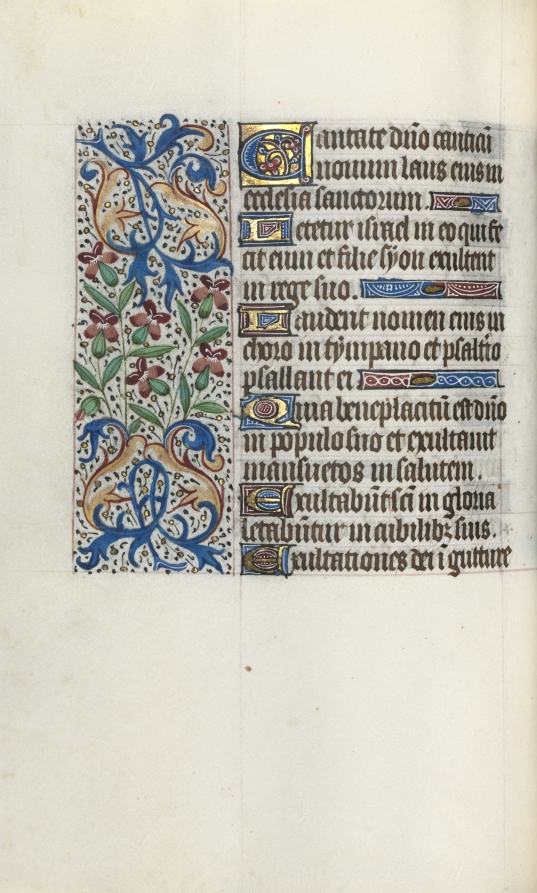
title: Book of Hours (Use of Rouen): fol. 45v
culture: France, Rouen, 15th century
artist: Master of the Geneva Latini (French, active Rouen, 1460–80)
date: c. 1470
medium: ink, tempera, and gold on vellum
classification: Bound Volume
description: In the late 1400s and early 1500s Rouen was an established and important center of book production. The city’s cathedral had a wealthy chapter that spent large sums of money to commission books and to maintain its extensive library. The stationers and booksellers would have likely been concentrated in or near the cathedral precinct. This artist, named after a manuscript now in Geneva, was Rouen’s principal illuminator during the second half of the 1400s.